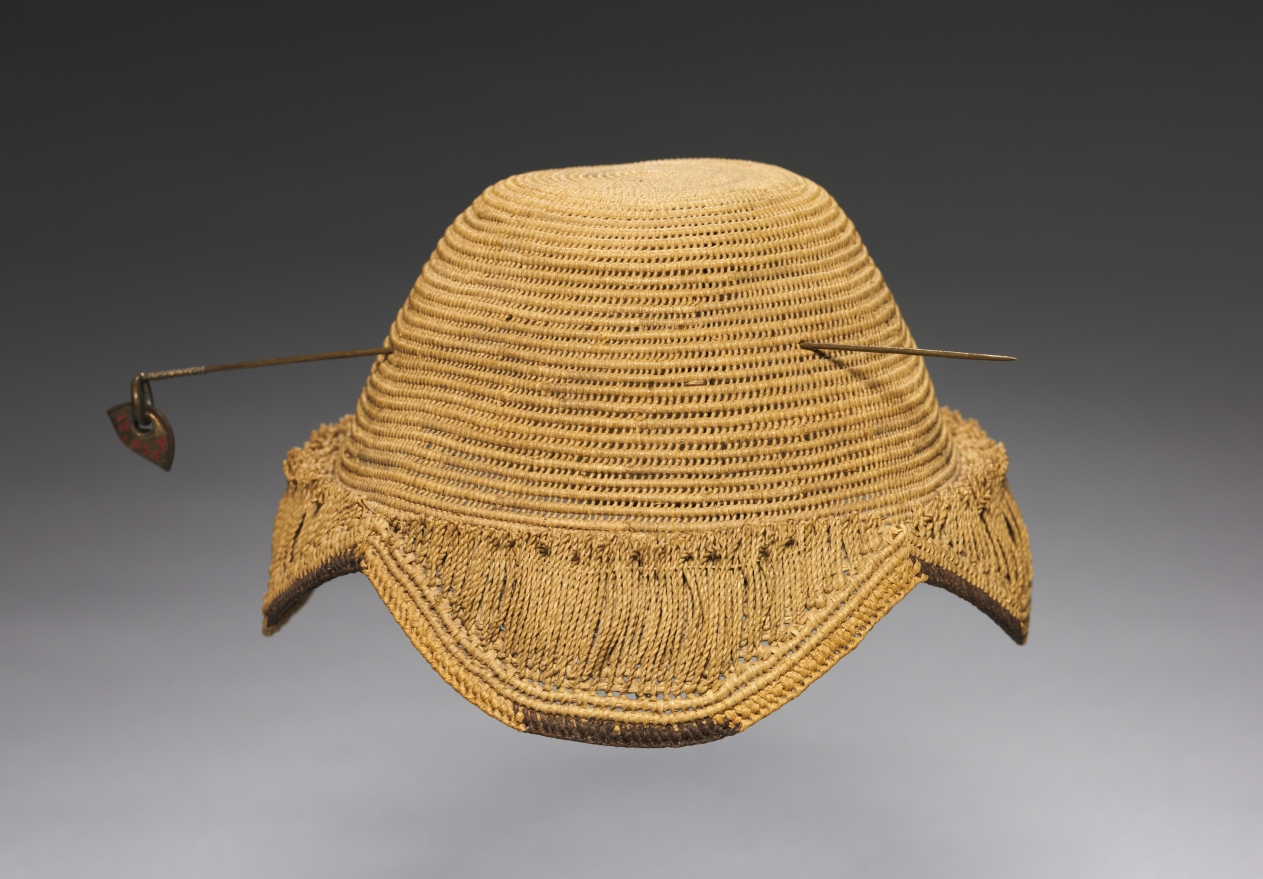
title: Hat (laket mishiing) with a pin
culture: Africa, Central Africa, Democratic Republic of the Congo, Kuba-style maker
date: early 1900s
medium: Raffia, metal, and dye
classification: Garment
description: Titled Kuba men and prominent women wear the laket, a small ornate dome-shaped hat. An essential fashion item of adult men in good social standing, it focuses special attention on the head as a significant marker of individual identity, ethnic affiliation, status, and role in society. This prestige object is secured on the crown of the head with a nine-and-a-half-inch metal pin that pierces through the hat onto a clump of hair. The laket is made from undyed raffia palm fiber that was then coiled into threads and woven. There are two examples of the laket: the plain type with the flat top, and the more elaborate type called the laket mishiing.